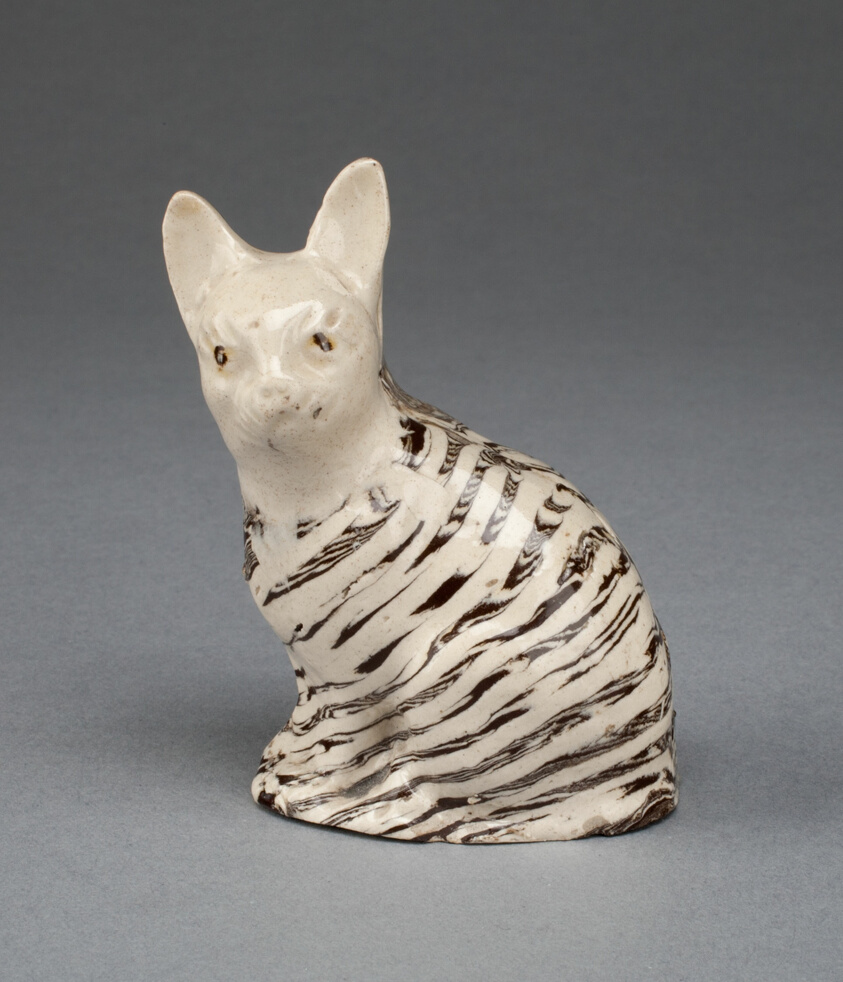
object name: Ceramics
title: Cat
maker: Staffordshire, England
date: c. 1750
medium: Lead-glazed earthenware (agateware)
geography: Staffordshire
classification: earthenware; european decorative arts; lead-glazed earthenware; agateware; ceramics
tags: cats, animals